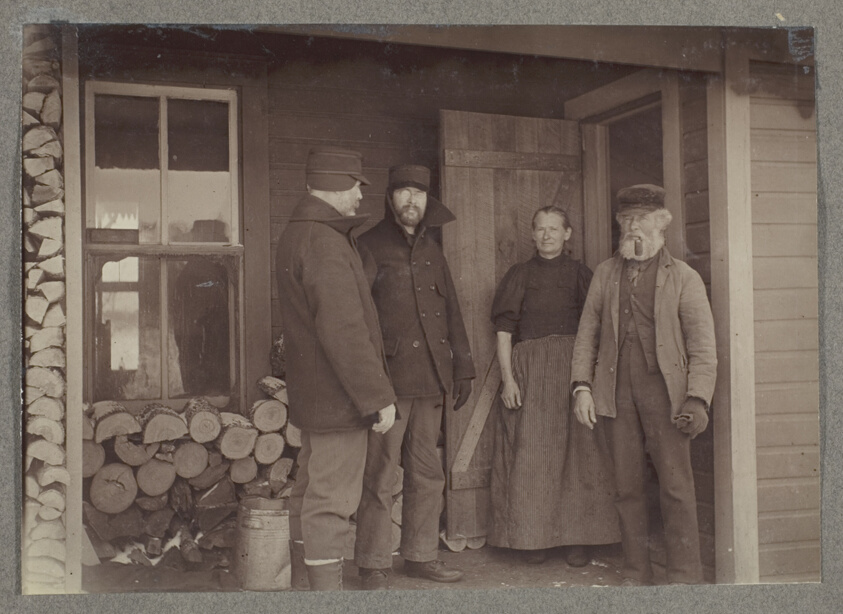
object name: Photograph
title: Untitled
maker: Artist unknown; American, early 20th century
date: c. 1905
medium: Gelatin silver print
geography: United States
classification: photograph; photography